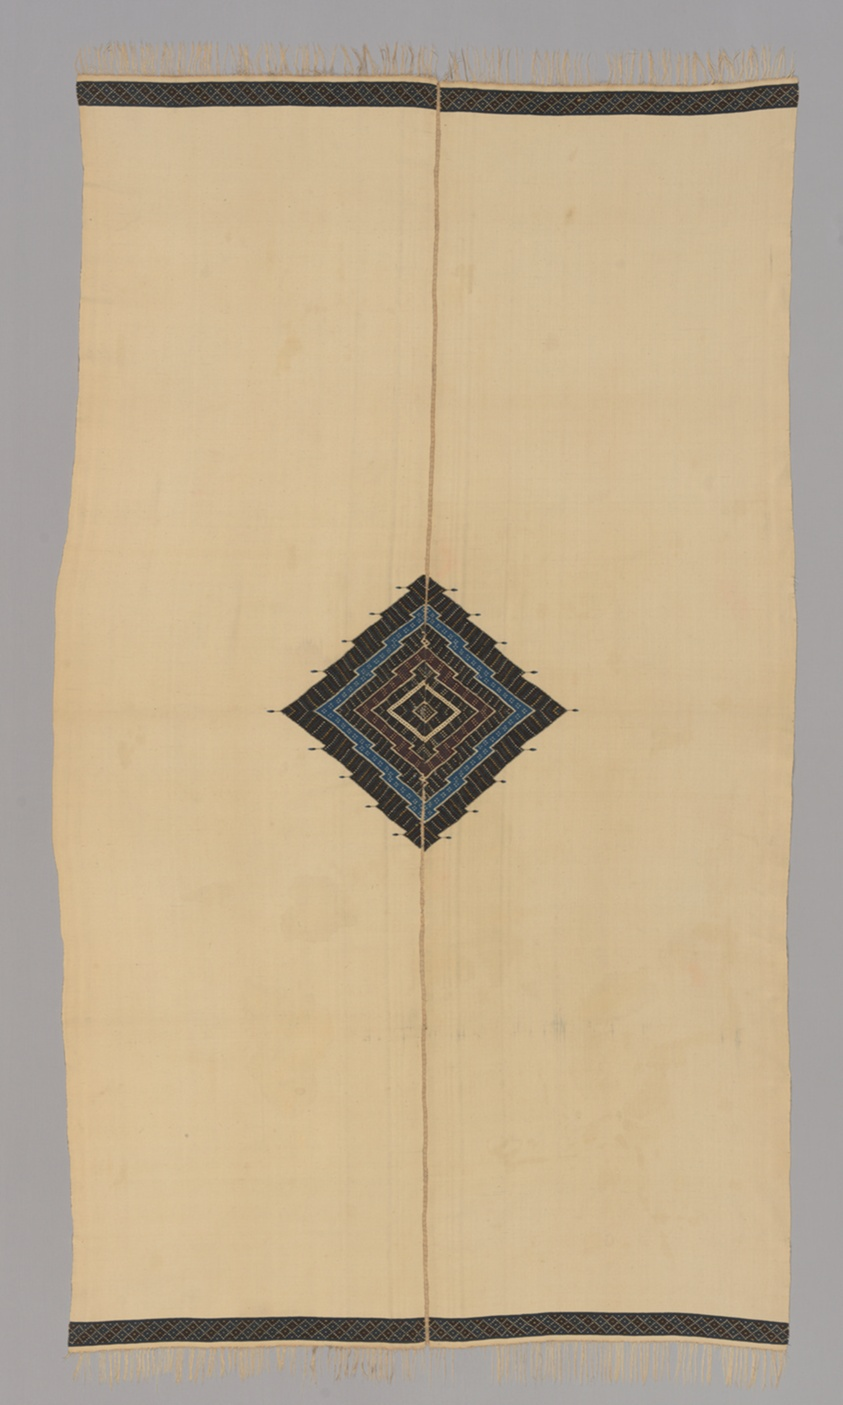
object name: Textile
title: Sarape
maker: Saltillo, Mexico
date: before 1800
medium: Cotton and wool, tapestry weave; joined with cotton, needle-made knotted insert; plied and knotted warp fringe; two loom widths joined; all selvages present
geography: Saltillo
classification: textile; weaving; needlework (visual works); costume; dress (garment); clothing